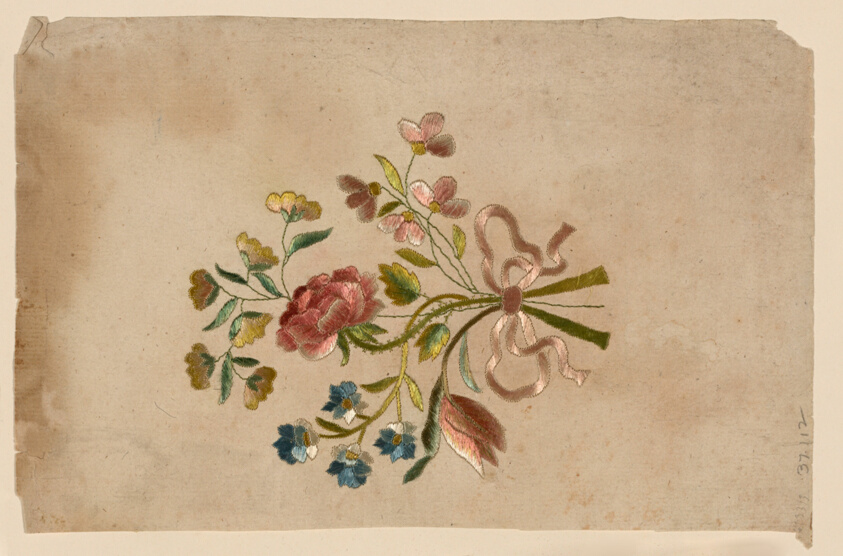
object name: Textile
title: Pattern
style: bukhara, central asian, asian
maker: Bukhara, Turkestan, Uzbekistan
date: 18th century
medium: embroidery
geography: Uzbekistan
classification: textile; needlework (visual works)